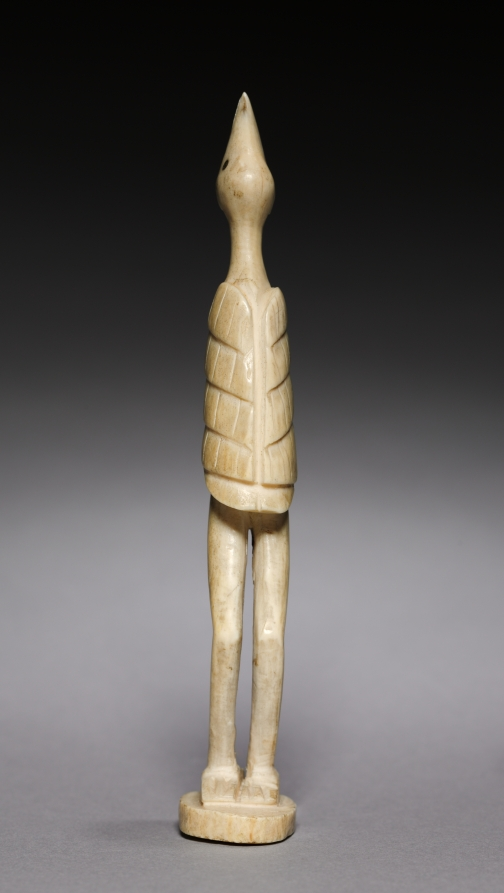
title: Bird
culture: Africa, Central Africa, Democratic Republic of Congo, unknown maker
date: 1900s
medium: Elephant ivory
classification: Sculpture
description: This long-legged bird of an unidentified species was most likely carved as a souvenir.